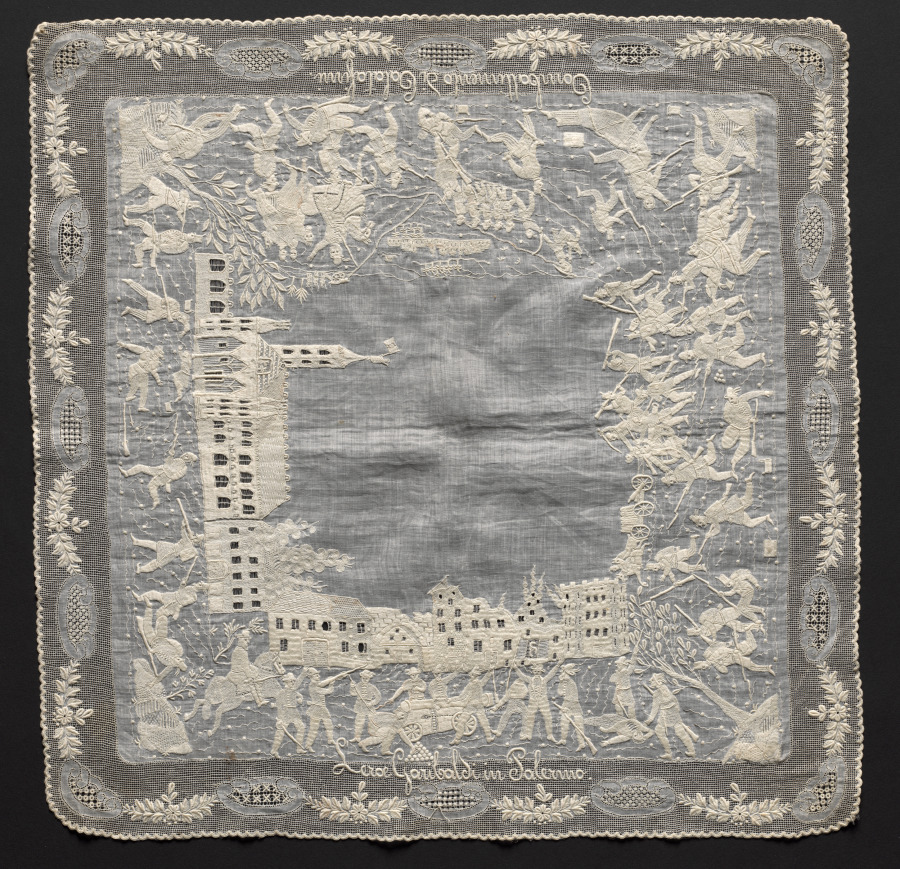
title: Lace Handkerchief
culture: Italy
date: 1850–99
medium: Plain weave cotton (est.): needle lace (cutwork and drawnwork) and embroidery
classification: Embroidery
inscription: on one side: "Combattimento di Calatafimi" and on the other: "L'eroe Garibaldi in Palermo."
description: The embroidery on this handkerchief depicts the Battle of Calatafini in 1860 and the hero Garibaldi in Palermo. The inscription reads: Combattimento di Calatafini" and L'erce Garibaldi in Palermo."